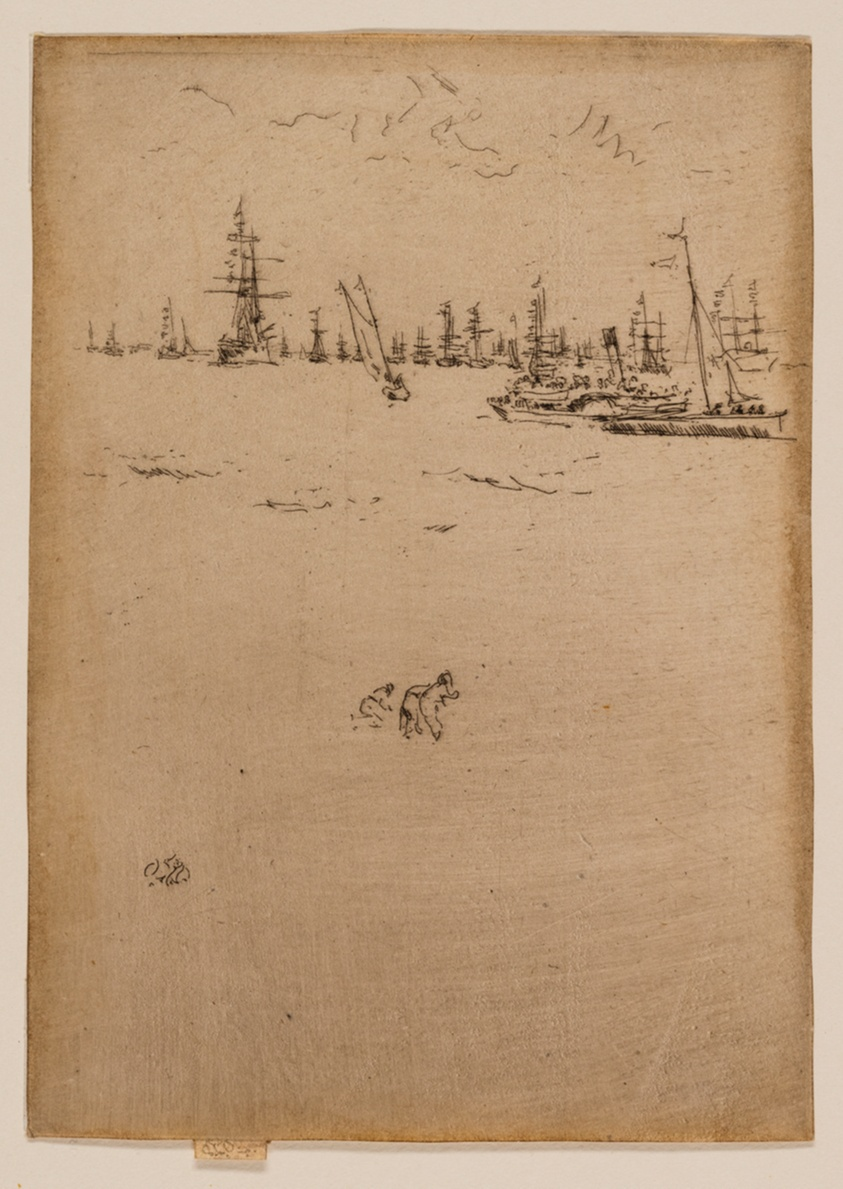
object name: Print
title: The Visitors' Boat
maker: James McNeill Whistler (American, 1834-1903)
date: 1887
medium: Etching with foul biting in black ink on cream laid paper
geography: United States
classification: etching; foul biting; print; prints and drawing; paper